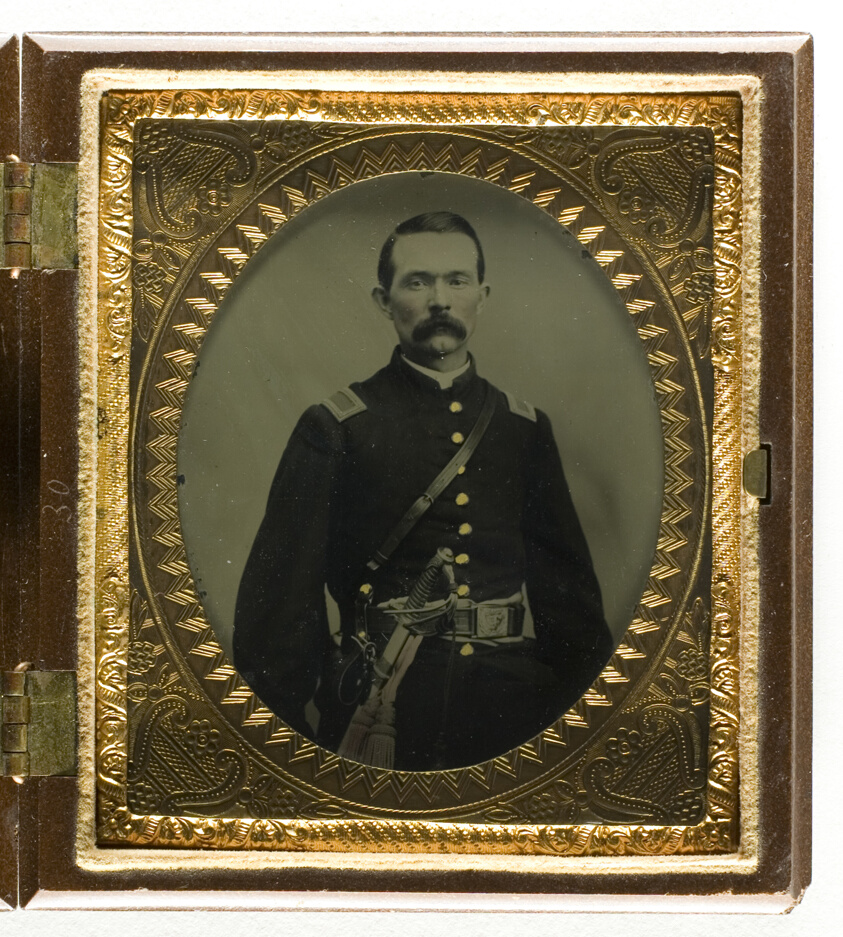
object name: Photograph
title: Untitled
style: 19th century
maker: Artist unknown; 19th century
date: 1855/75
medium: Tintype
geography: Unknown Place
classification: daguerreotype; photographic process; photography; photograph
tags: portraits, portraits: male subject, photography